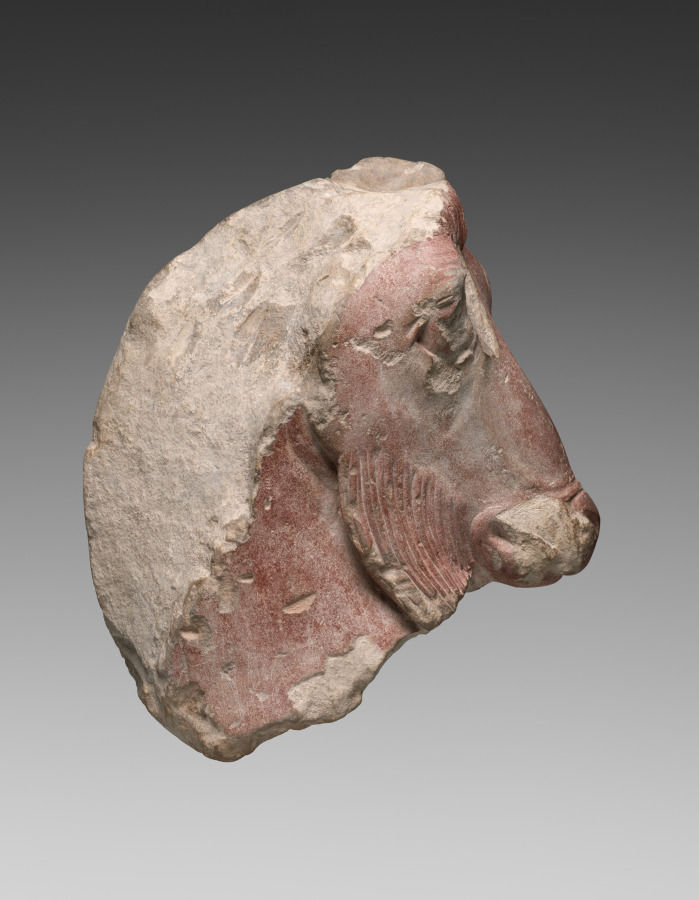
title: Fragment of a Goat's Head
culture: Greece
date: c. 500–475 BCE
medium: limestone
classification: Sculpture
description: Initially identified as a horse head, this fragmentary sculpture, once painted reddish-brown, has a beard, indicating that it depicts a goat. Its large size, however, together with its neck position and unusual round eye, have all prompted questions. Was the head broken from a rearing goat? Or did it represent Pan, the rustic shepherd god often depicted as half-man, half-goat? If Pan, some scholars have connected it with a fifth-century BC Athenian sanctuary erected to thank the god for aid in battle. An alleged provenance near the Athenian Acropolis supported this idea, but scientific tests suggest otherwise.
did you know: Pan, the goat-headed god, is often called a son of Hermes, but sources disagree.